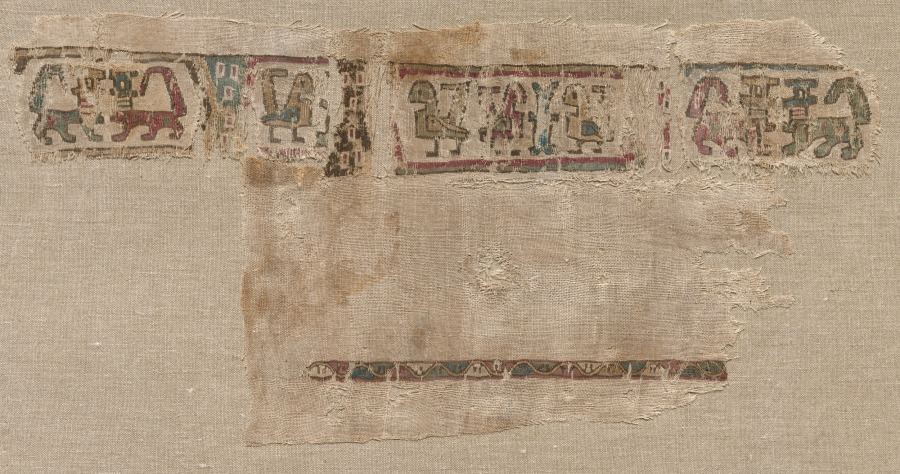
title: Fragment of a Tiraz-Style Textile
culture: Egypt, Fatimid period, Caliphate of al-Mustansir, 1000s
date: 1081–94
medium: tabby ground with inwoven tapestry ornament; linen and silk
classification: Textile